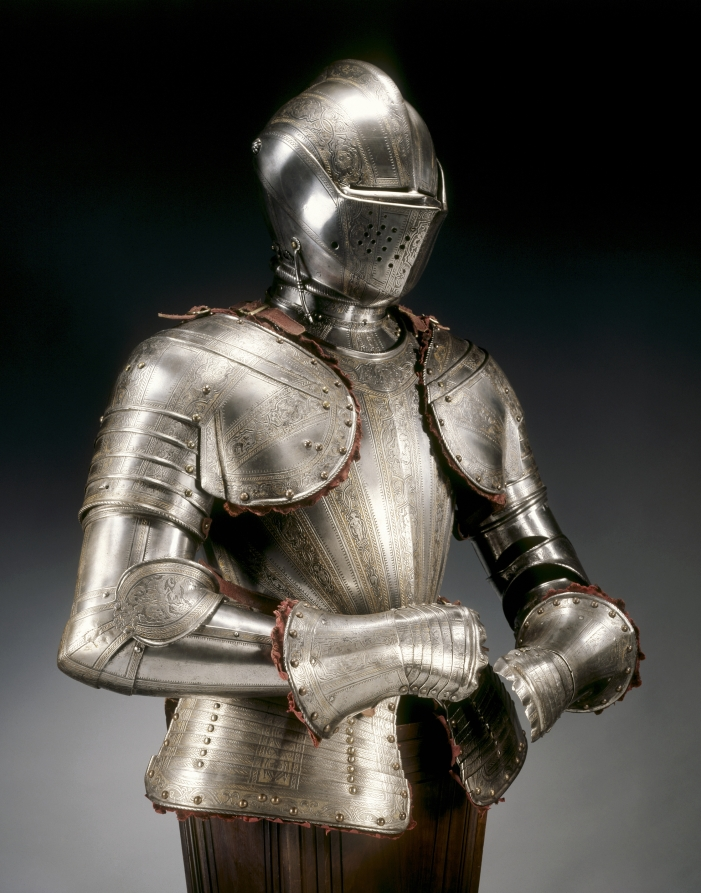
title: Half Armor for the Foot Tournament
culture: Italy, Milan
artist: Pompeo della Cesa (Italian, active 1572–93)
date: c. 1590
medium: etched and gilded steel, brass rivets, leather and velvet fittings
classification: Arms and Armor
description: This armor was designed for the foot tournament, an event that was separate from the equestrian jousts popularized during the Middle Ages and still favored among Renaissance aristocracies throughout Europe. Foot tournaments were commonly fought over a barrier that separated the combatants and gave protection to their legs, so a half-armor such as this one provided sufficient protection. The original owner of this suit would have worn it with colorful puffed and slashed britches and hose. The use of outlandish accessories, such as a large ostrich feather plume (a brass plume holder may be seen on the back of the helmet) and red velvet pickadils between the steel plates, provided additional splendor.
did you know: Pompeo della Cesa was the Armani or Gucci of the 1500s; everyone wanted to wear him.